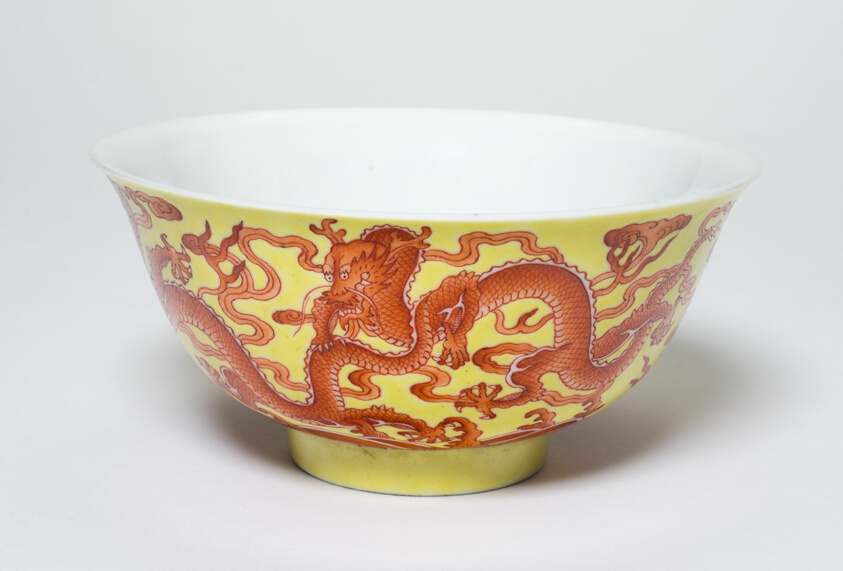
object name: Vessel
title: Bowl with Entwined Dragons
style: Chinese (culture or style)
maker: China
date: Qing dynasty (1644–1911), Qianlong reign mark and period (1736–1795)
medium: Porcelain painted in underglaze iron red and overglaze yellow enamel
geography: China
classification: bowl; porcelain; dish (vessel); asian art; ceramics; vessel